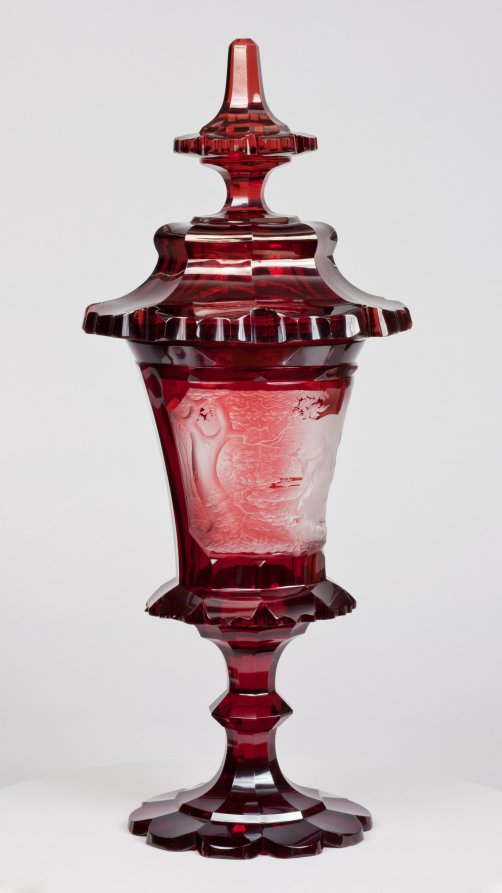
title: Covered Cup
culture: Bohemia, 19th century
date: mid-1800s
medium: ruby glass with engraved decoration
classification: Glass